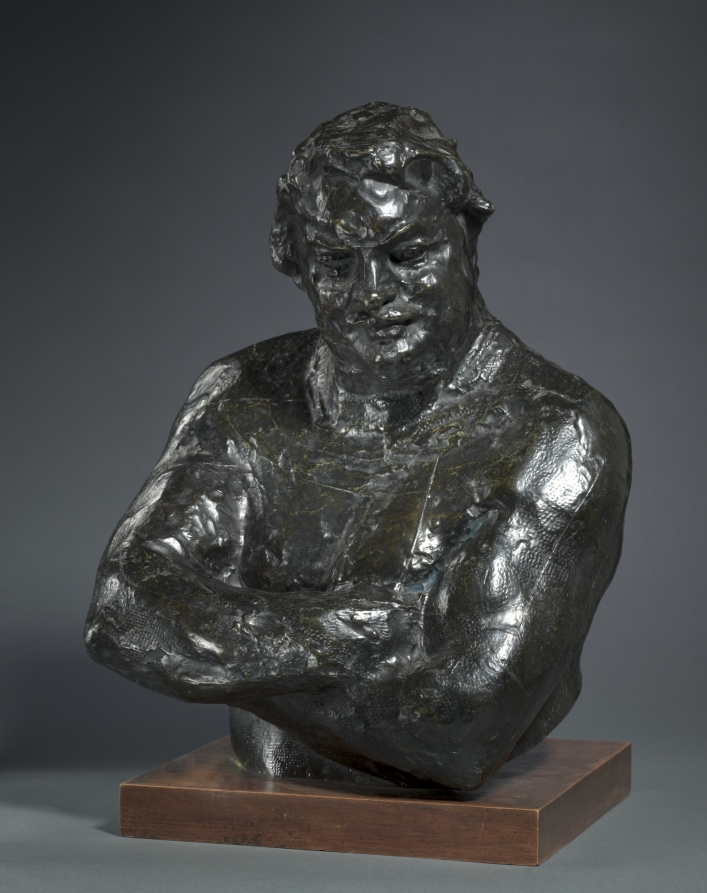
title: Study of Honoré de Balzac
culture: France, 19th century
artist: Auguste Rodin (French, 1840–1917)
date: 1891–1892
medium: bronze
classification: Sculpture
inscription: Signed on side, under left arm: "A. Rodin"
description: In 1891 Rodin was commissioned to create a monument honoring the celebrated French writer Honoré de Balzac. The figure evolved through multiple stages over a seven-year period as Rodin explored different methods of conveying the author’s genius and personality. This bust is a study for the first version, in which the full figure stands upright with legs apart, arms crossed over his corpulent belly. Rodin’s unglamorous portrayal of a national hero shocked the public accustomed to idealized figures in public monuments. The final design was even more intensely criticized because Rodin reduced the body to a powerful, abstract mass intended to convey the symbolic essence of the writer’s creative vitality.